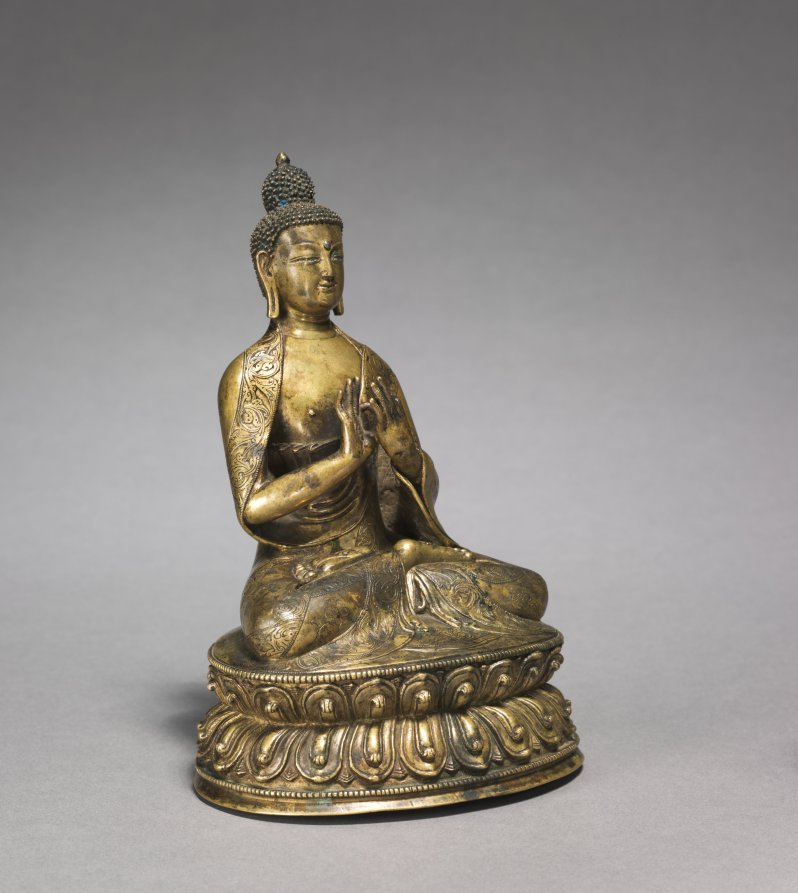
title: Seated Maitreya Buddha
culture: Western Tibet, Yongle Period (1403-1424)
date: c. 1400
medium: bronze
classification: Sculpture